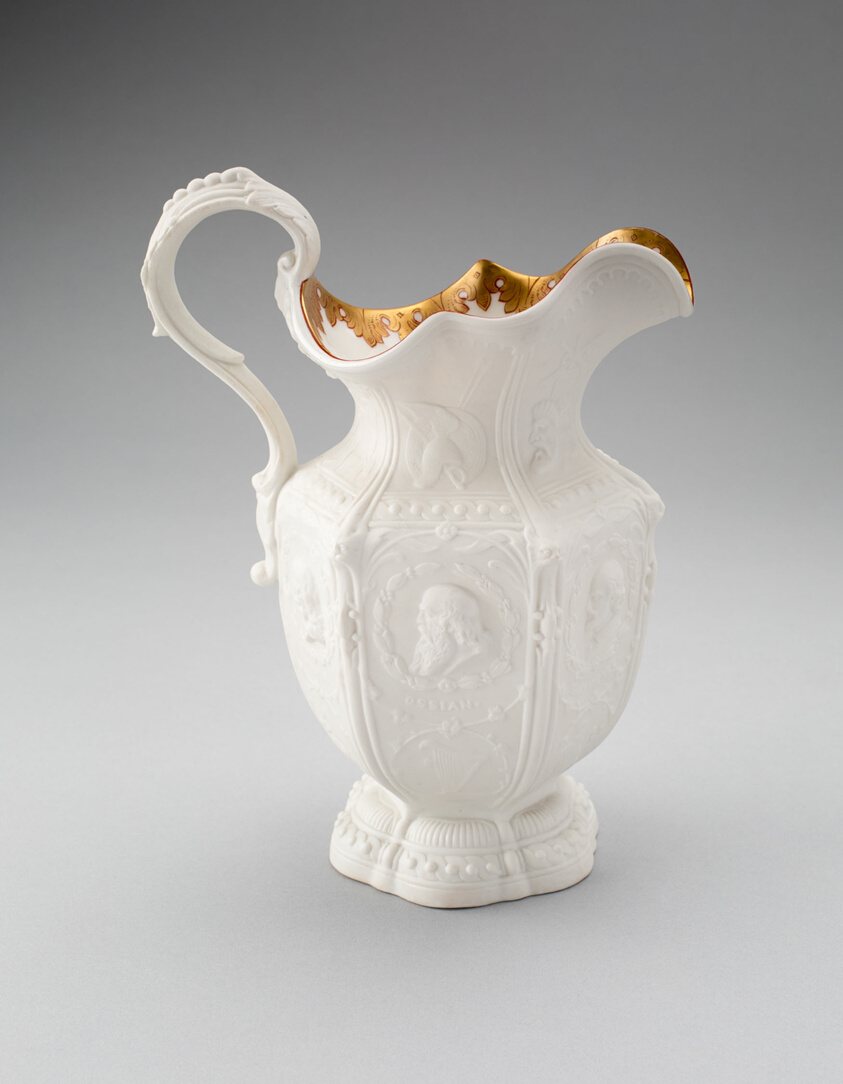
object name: Ceramics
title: Poet's Pitcher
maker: Designed by Karl L. H. Müller (American, born Germany, 1820–1887); Union Porcelain Works (American, 1863–c. 1922); Greenpoint, New York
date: 1875–86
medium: Parian porcelain and glaze with gilding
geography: Brooklyn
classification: pitcher (vessel); vessel; porcelain; art of the americas; ewer (vessel); pottery; ceramics; american decorative arts; american arts; decorative arts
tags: table, poets, poetry, dining, drinking